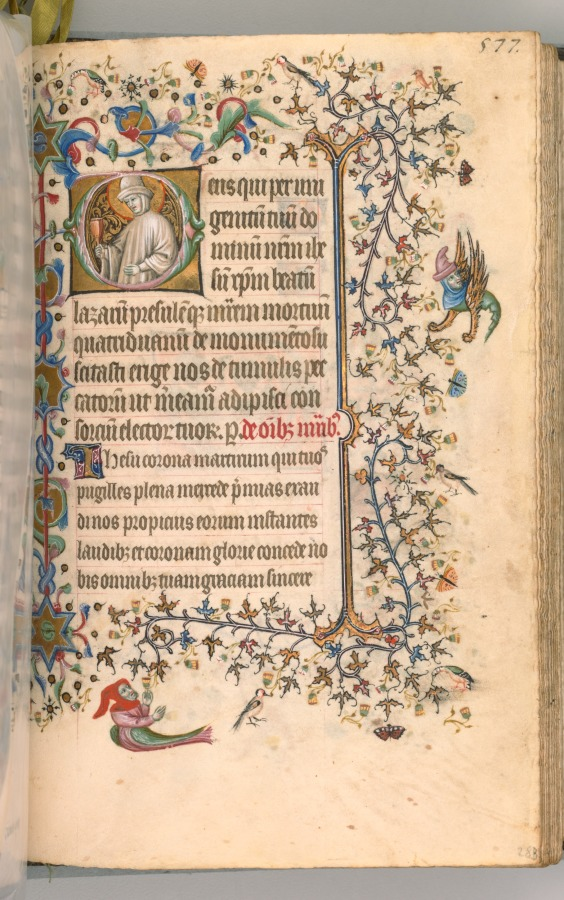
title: Hours of Charles the Noble, King of Navarre (1361-1425): fol. 283r, St. Lazarus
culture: France, Paris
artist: Master of the Brussels Initials and Associates (French)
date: c. 1405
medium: ink, tempera, and gold on vellum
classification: Bound Volume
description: This precious volume was obviously highly prized by its owner, the French-born King of Navarre, who had his coat of arms painted on no less than twenty folios. Rather than directly commissioning this manuscript from a specific workshop, it seems that Charles the Noble acquired his book of hours -- perhaps ready-made for the luxury market -- while on a trip to Paris in 1404-05. A collaborative effort, six painting styles are evidenced within the pages of this codex, those of two Italians, two Frenchmen, and two Netherlanders. The painter who was responsible for the planning and decoration of the book, and who produced seventeen of the large miniatures, was a Bolognese artist known as the Master of the Brussels Initials. His principal assistant, responsible for most of the borders, was a Florentine who signed his name "Zecho" da Firenze on folio 208 verso.